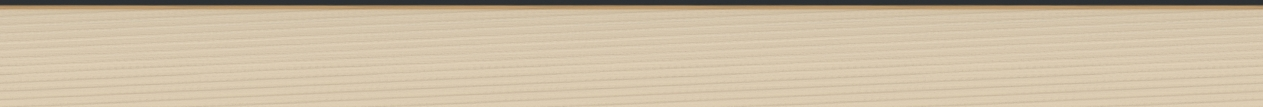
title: Zhao Mengfu Writing the Heart (Hridaya) Sutra in Exchange for Tea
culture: China, Ming dynasty (1368–1644)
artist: Qiu Ying (Chinese, 1494–1552)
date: 1542–43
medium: handscroll, ink and light color on paper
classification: Painting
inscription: Inscription accompanying text of "Heart" sutra, by Wen Zhengming 文徵明 (1470-1559): Zhengming 徵明, written in a boat at Kunshan 崑山, on the twenty-first day of the ninth month, in the renyin 壬寅 year, the twenty-first year of the Jiajing era [1542].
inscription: Colophon by Wang Shih-mou: Chou Yü-shün [Feng-lai] of K'un-shan was a scholarly, refined connoisseur of antiquities. He had acquired the poem written by Chao Ch'eng-chih [Chao Meng-fu] about the exchage of tea for Chao's calligraphy of the Prajna sutra. But the sutra itself, also written by Chao Meng-fu, is lost. He therefore asked Ch'iu Shih-fu [Ch'iu Ying] to do a painting and had Wen Cheng-ming, the artist-in-attendance, write the Hridaya Sutra in the "small, regular" style for replacement. Both works are so excellent that even Chao Meng-fu himself would certainly applaud if he should be reborn to see them. I, Shih-mou, had gotten possession of this scroll from the family of Chou Yü-shün, and since it was so wonderfully matched with one of the treasures in my collection. the Hridaya Sutra written by Chao Meng-fu for Priest Li in "running script," like the reuniting of two halves of a jade pi, I completed the scroll with the several colophons written for the "tea-exchange" poem. I did this because the painting of Ch'iu Ying and the calligraphy of Wen Cheng-ming are definitely masterpieces by themselves with absolutely no need to depend on any of the colophons written for the Chao Meng-fu poem. Furthermore, the two sons of Wen Cheng-ming, Shou-ch'eng [Wen P'eng] and Hsiu-ch'eng [Wen Chia]. have each written a colophon explaining the reason for replacing the calligraphy. As their writings are both acceptable for high standard, I didn't want to throw them away. [So by separating these into two scrolls] I was able to get two complete works of art in one clever stroke. I was quite pleased with myself, and hope that those who see this scroll shall not get suspicious because of the missing colophons. Wang Shih-mou wrote in his Jih-sun-chai study, on the first day of the tenth month, in the chia-shen year of the Wan-li era [1584].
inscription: Colophon by Wen P'eng: I-shao [Wang Hsi-chi] wrote in exchange for a flock of geese. Su Tung-po wrote in exchange for meat. Both episodes have become legends of a thousand years. Sung-hsüeh [Chao Meng-fu] "teased" Priest Kung for tea, and the story was immediately immortalized in the poems by all the famous scholars of the times. Indeed, how could one say his humor and elegance are not equal to the ancient worthies? Unfortunately, the poetry has survived but the writing of the sutra is lost. Yü-shün [Chou Feng-lai] therefore asked my father to make up the writing and so here is the complete work of art. Respectfully inscribed by Wen P'eng in the mid-summer of 1543.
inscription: Colophon by Wen Chia: Sung-hsüeh [Chao Meng-fu], in exchanging tea leaves for his writing of the Prajna, had put himself in the company of Yu-chün [Wang Hsi-chih] who exchanged geese for his writing of the Huang-t'ing sutra [the Yellow Chamber, or the Wai-ching ching, a Taoist text attributed to the Yellow Emperor]. However, was this romantic and cultivated gesture really intended for such small things? Actually, he was only proud that the excellence of his calligraphy had made him worthy to be the successor of the Ch'in Dynasty master. Since, very unfortunately, Chao Meng-fu's writing [of the Prajna] was already lost, my father therefore agreed to replace it, and did the calligraphy in the style of the Yellow Chamber. In addition, Yu-shün [Chou Feng-lai] had asked Mr. Ch'iu Shih-fu [Ch'iu Ying] to do a painting of the sutra writing story in the style of Li Lung-mien at the head of the scroll. Now it would seem the entire episode should go down in history for immortality. Respectfully recorded by Wen Chia, on the eighth day of the eighth month, in the year of k'uei-mao [1543]. trans. WKH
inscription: 4 colophons and 23 seals: 1 colophon, dated 1543, and 2 seals of Wen Peng (1498-1573); 1 colophon, dated 1543, and 2 seals of Wen Chia (1501-1583); 1 colophon, dated 1584, and 3 seals of Wang Shih-mou (1536-1588); 2 seals of Chou Feng-lai (16th c.); 3 seals of Sung Lo (1634-1713); 5 seals of the Ch'ien-lung emperor (r. 1736-95); 1 colophon, dated 1902, and 1 seal of Fei Nien-tz'u (1885-1905); 4 seals of Wan-go H. C. Weng (b. 1918); 1 seal unidentified.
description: The Yuan dynasty calligrapher Zhao Mengfu (1254–1322) is said to have transcribed the Heart Sutra for a certain priest named Li in exchange for tea. Later, during the Ming dynasty, the professional painter Qiu Ying from Suzhou painted this scene for his patron. Here, Zhao Mengfu holds a brush and has a piece of paper laid out before him. On the table is an ink stone, an ink stick, and a small water dropper. Drops of water would dissolve the ink stick into liquid ink when it was ground on the flat square stone.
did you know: Qiu Ying was born to a peasant family, but his natural talent led him to a successful career as a professional painter with wealthy patrons.